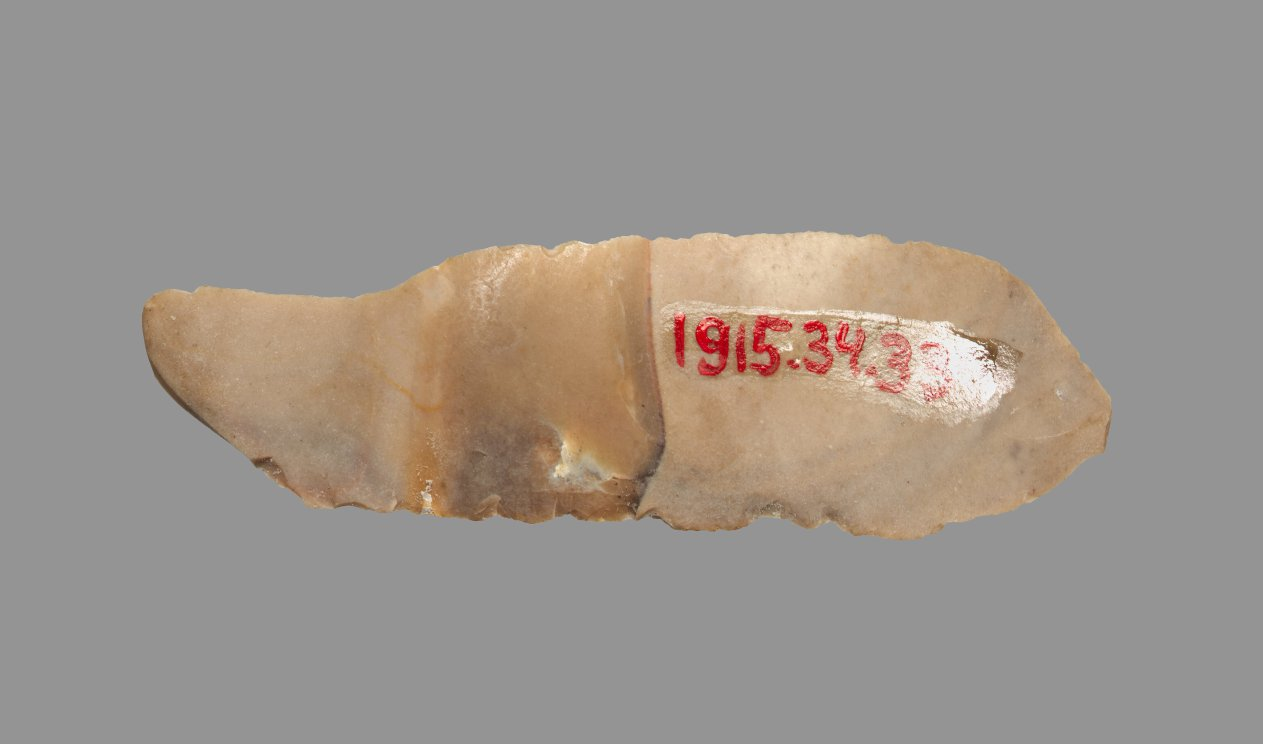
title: Sickle Blade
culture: Egypt, Middle Kingdom (2040–1648 BCE), Dynasty 12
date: 1980–1801 BCE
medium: flint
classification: Implements